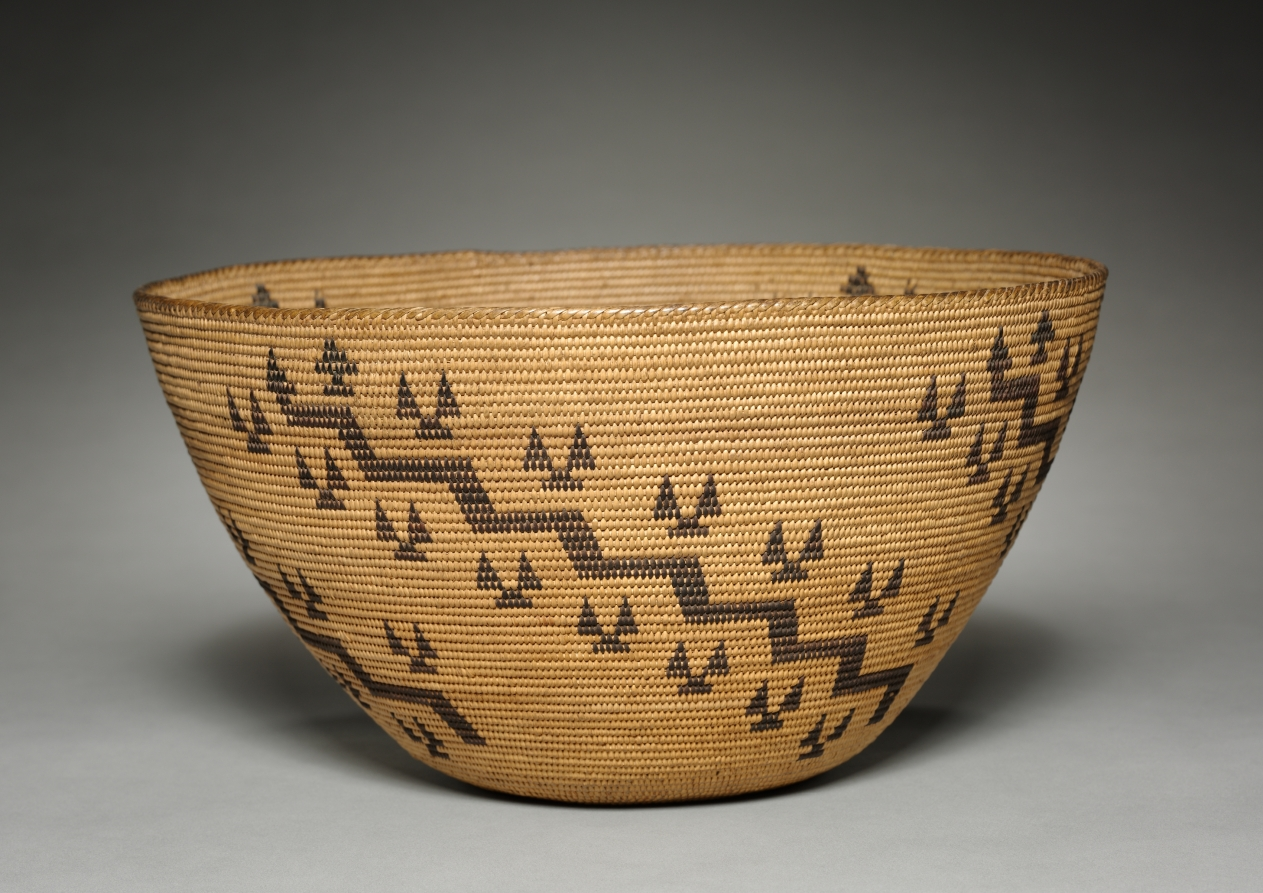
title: Cooking Bowl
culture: California, Mono, Lake Paiute, late 1800s–early 1900s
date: 1890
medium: willow, bracken fern; coiled (3 rods)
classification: Basketry